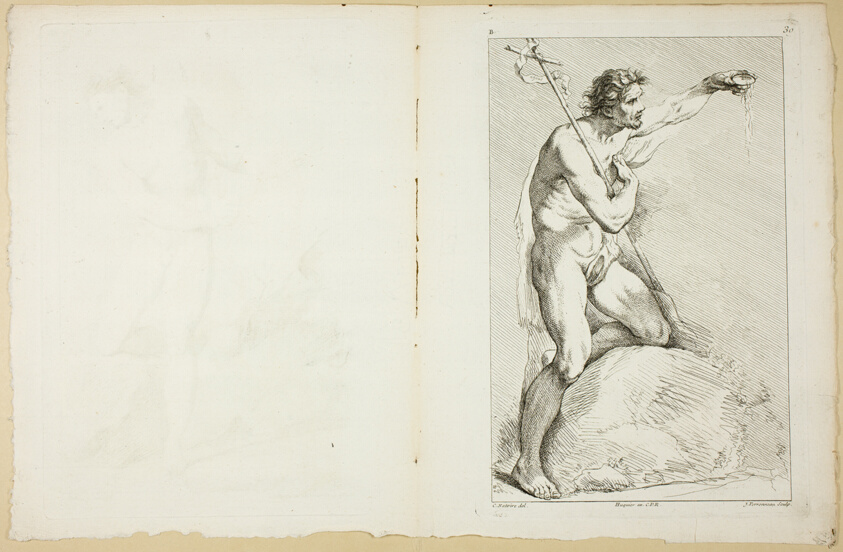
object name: Print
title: Page 38 and Page 39, from Seconde Livre de Figures d'Academies Gravées en Partie par les Professeurs de l’Académie Royale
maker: Collin de Vermont (French, 1693-1761); Jean-Baptiste Perronneau (French, 1715-1783); after Charles-Joseph Natoire (French, 1700-1777); printed by Gabriel Huquier (French, 1695-1772); published by Charles-Antoine Jombert (French, 1712-1784) (French, 18th century)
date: published 1745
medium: Etching (recto and verso) on ivory laid paper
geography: France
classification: etching; print; prints and drawing